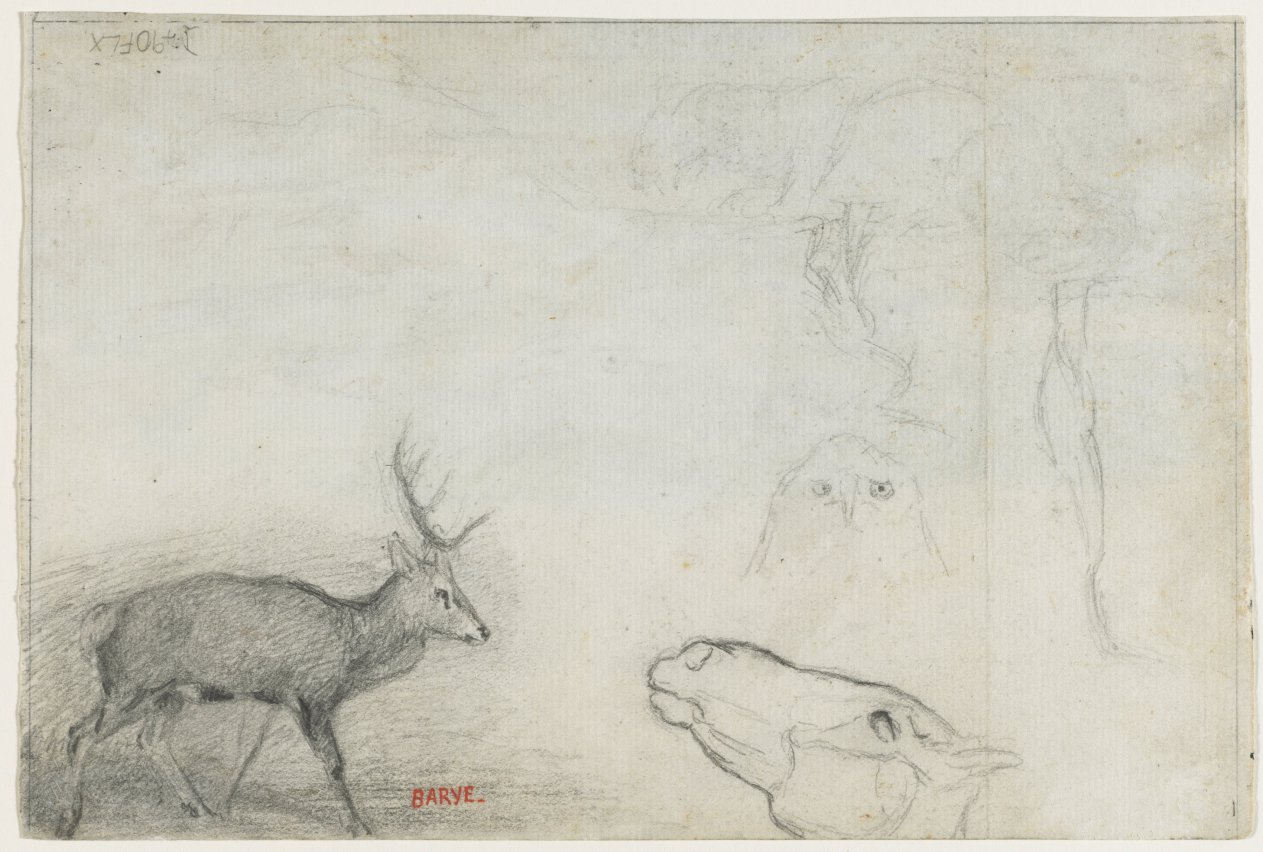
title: Studies of Animals (verso)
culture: France, 19th century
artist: Antoine-Louis Barye (French, 1796–1875)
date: c. 1823–75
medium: graphite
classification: Drawing